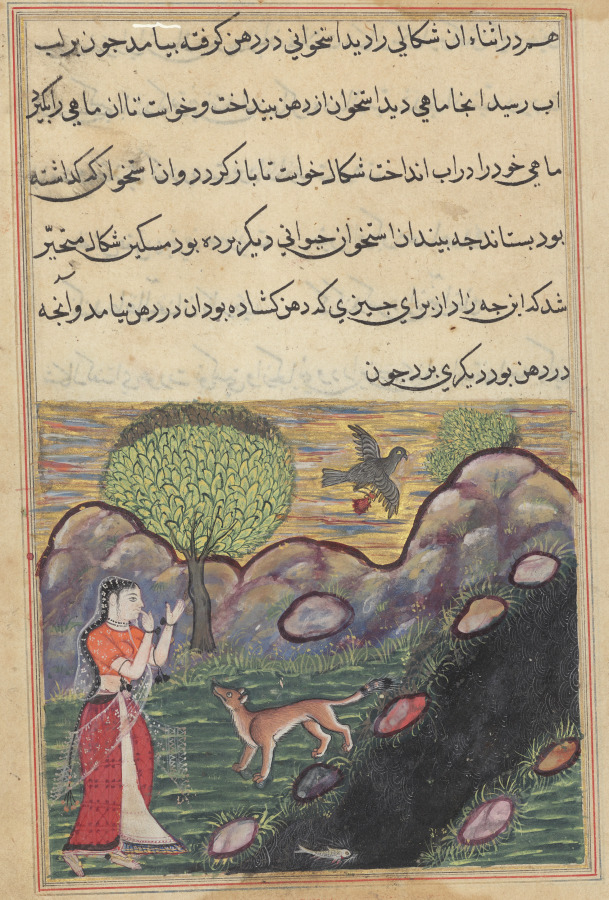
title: The daughter-in-law of the king of Banaras sees the jackal deprived of its food by a bird, as it unsuccessfully attempts to catch a fish, from a Tuti-nama (Tales of a Parrot): Sixteenth Night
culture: Mughal India, court of Akbar (reigned 1556–1605)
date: c. 1560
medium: gum tempera, ink, and gold on paper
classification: Painting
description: Having been left alone in the wilderness by her lover, the woman comes across the jackal who has just lost its meal. The wise jackal counsels her on the importance of satisfaction and instructs her to return to her husband. Above them, a large bird flies away with the jackal’s food gripped in its feet.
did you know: The fish that the jackal was trying to catch is visible in the stream.